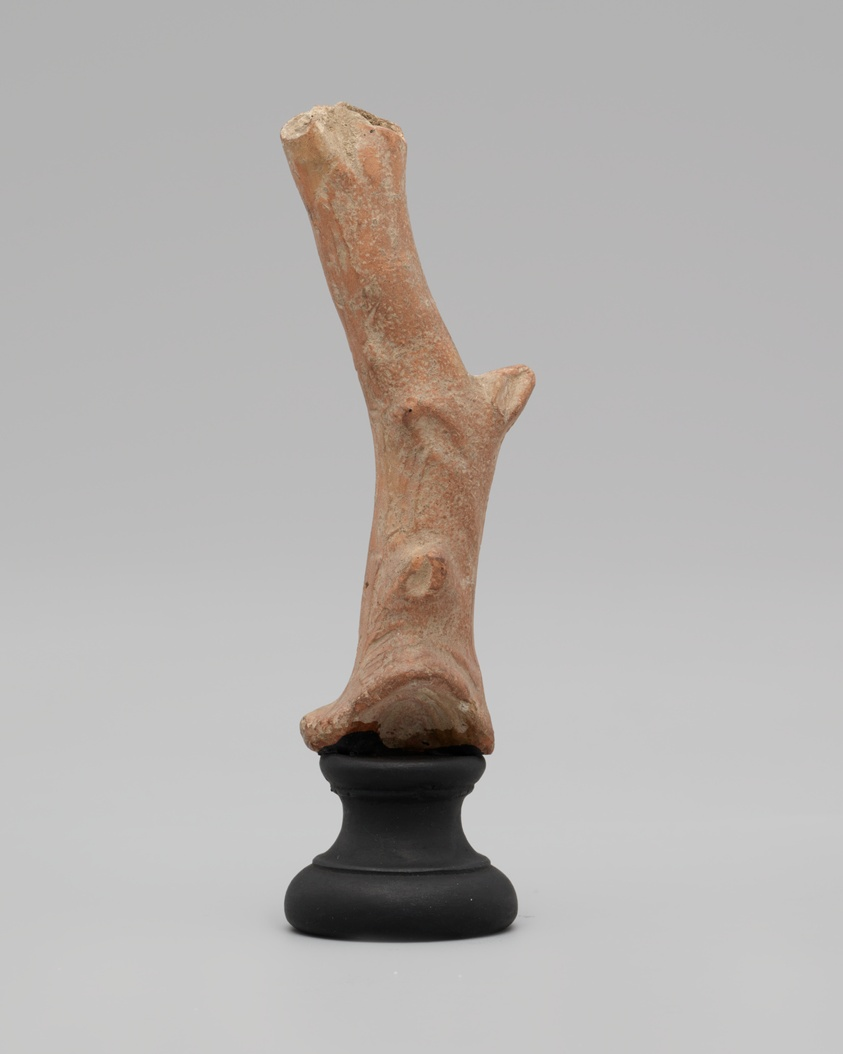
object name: Sculpture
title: Statuette of a Tree Trunk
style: greek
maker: Greek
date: 4th-3rd century BCE ?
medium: terracotta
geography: Greece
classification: earthenware; ceramics; sculpture; ancient art